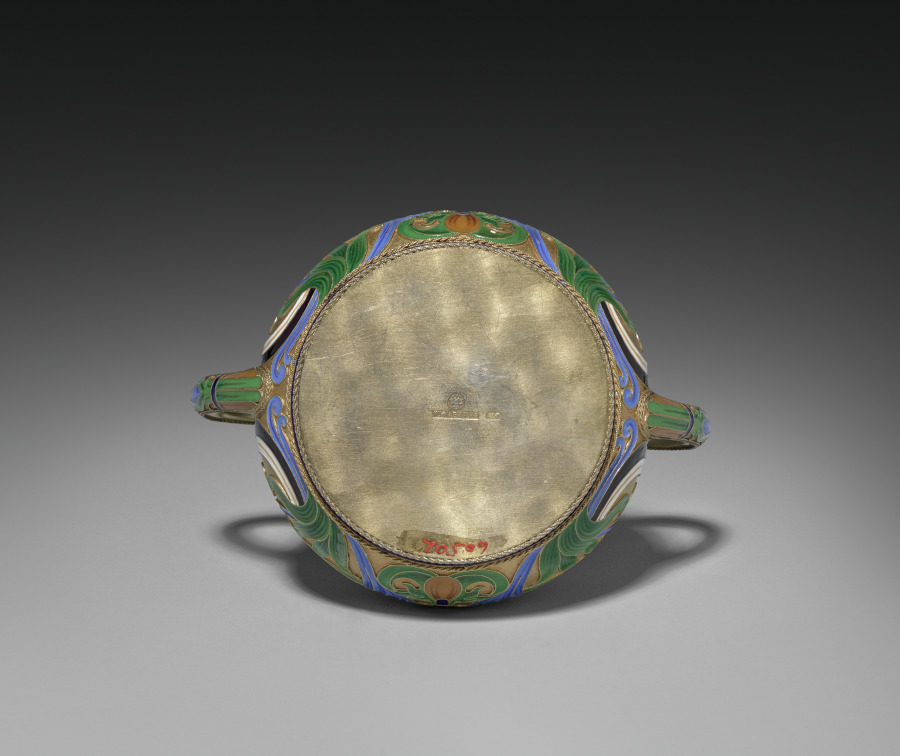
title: Covered Sugar Bowl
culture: Russia, St. Petersburg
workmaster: attributed to Feodor Ivanovich Rückert (Russian, 1840–1917)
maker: House of Fabergé (Russian, 1842–1918)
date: 1887–96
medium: silver gilt, opaque cloisonné enamel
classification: Miscellaneous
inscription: 84, St. George [assay mark for Moscow, 1882-1896]; C. Fabergé (in Cyrillic); double-headed eagle [imperial warrant]; St. George?; initials of Carl Fabergé (in Cyrillic); 10593 scratched.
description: Fabergé’s craftsmen in Moscow, especially under the watchful eye of workmaster Feodor Rückert, became known for their work in the pan-Slavic or neo-Russian style, hearkening back to 17th-century motifs of Russian folk art. Often on rather conventional shapes, Rückert and his silversmiths created an explosion of color, achieved through the historic technique of cloisonné enamel in which tiny metal lines are soldered to the surface then filled with glass powders in various colors and fired to create a high gloss finish. The result is a spectacular evocation of the 17th-century originals. Far from mere copies, however, Rückert's designs, such as this tea service, employ naturalistic or abstract motifs in a thoroughly modern adaptation of a remarkable earlier period of Russian art and decoration.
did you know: This covered sugar bowl is part of a larger tea service.